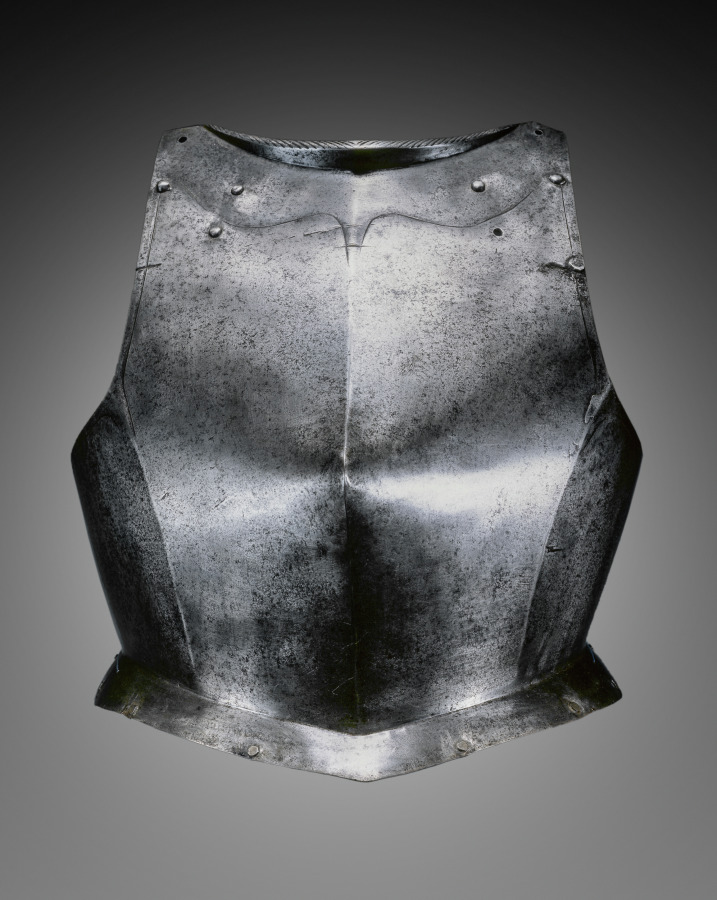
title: Gothic Breastplate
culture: Germany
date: c. 1540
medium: steel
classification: Arms and Armor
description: A breastplate is an element of armor that protects the chest and abdomen; it would have been worn with a now missing backplate. Nuremburg was one of the chief armor production centers and gained international renown; armor produced there was exported throughout Europe. It was not a coincidence that Nuremburg was known for its armor. The ore available in the region made Nuremburg an iron producing center close to the raw material needed to make a better quality and reliable product.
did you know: If you are looking for this in the armor court make sure to look up; it is displayed as part of a panoply, or display with other arms.